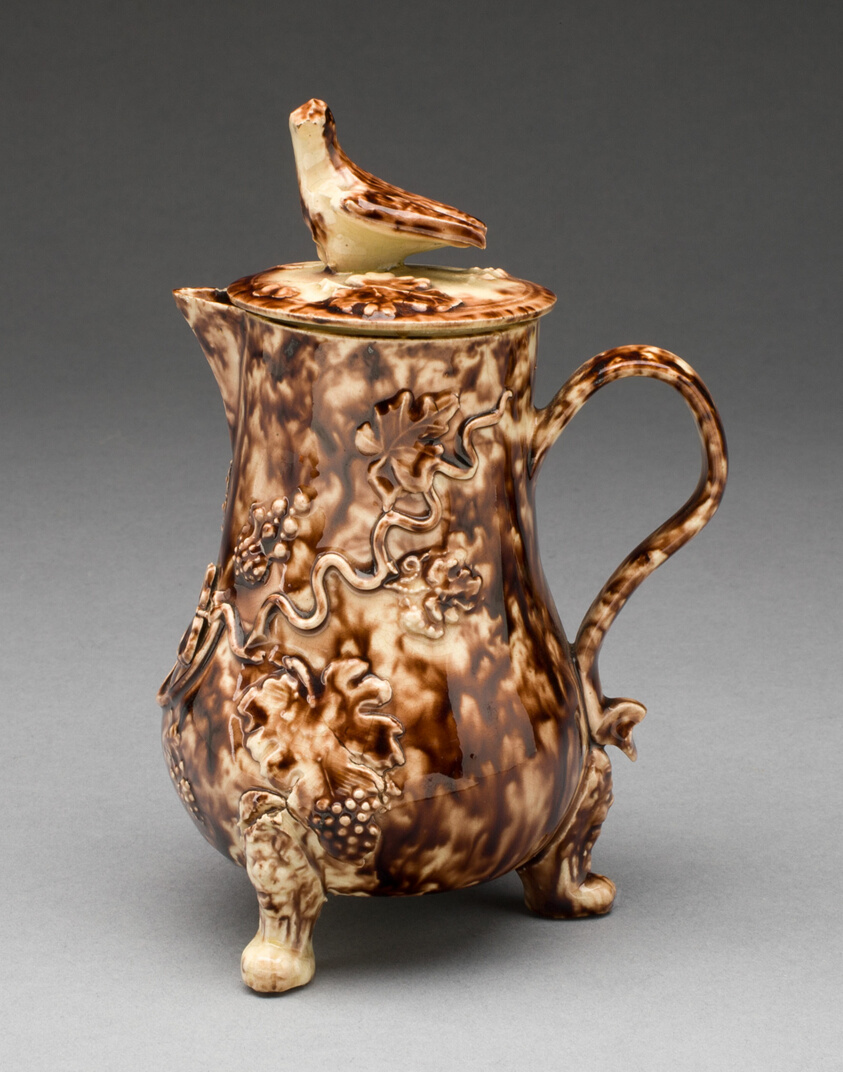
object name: Ceramics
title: Milk Jug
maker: England, Staffordshire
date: 1760/70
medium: Lead-glazed earthenware (creamware)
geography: Staffordshire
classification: earthenware; european decorative arts; ceramics; creamware; lead-glazed earthenware